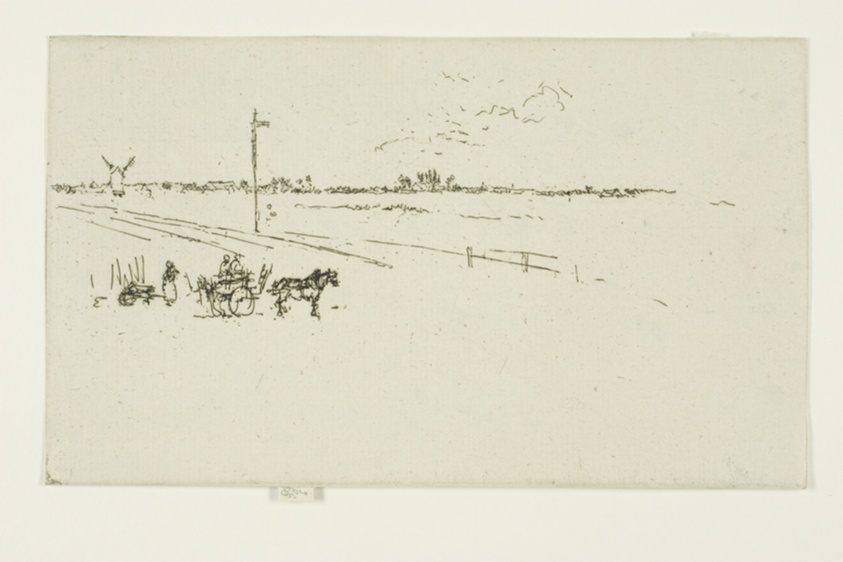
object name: Print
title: Railway-Station, Voves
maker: James McNeill Whistler (American, 1834-1903)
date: 1888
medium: Etching and drypoint with foul biting in black ink on cream laid paper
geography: United States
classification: etching; drypoint; print; prints and drawing; foul biting; paper